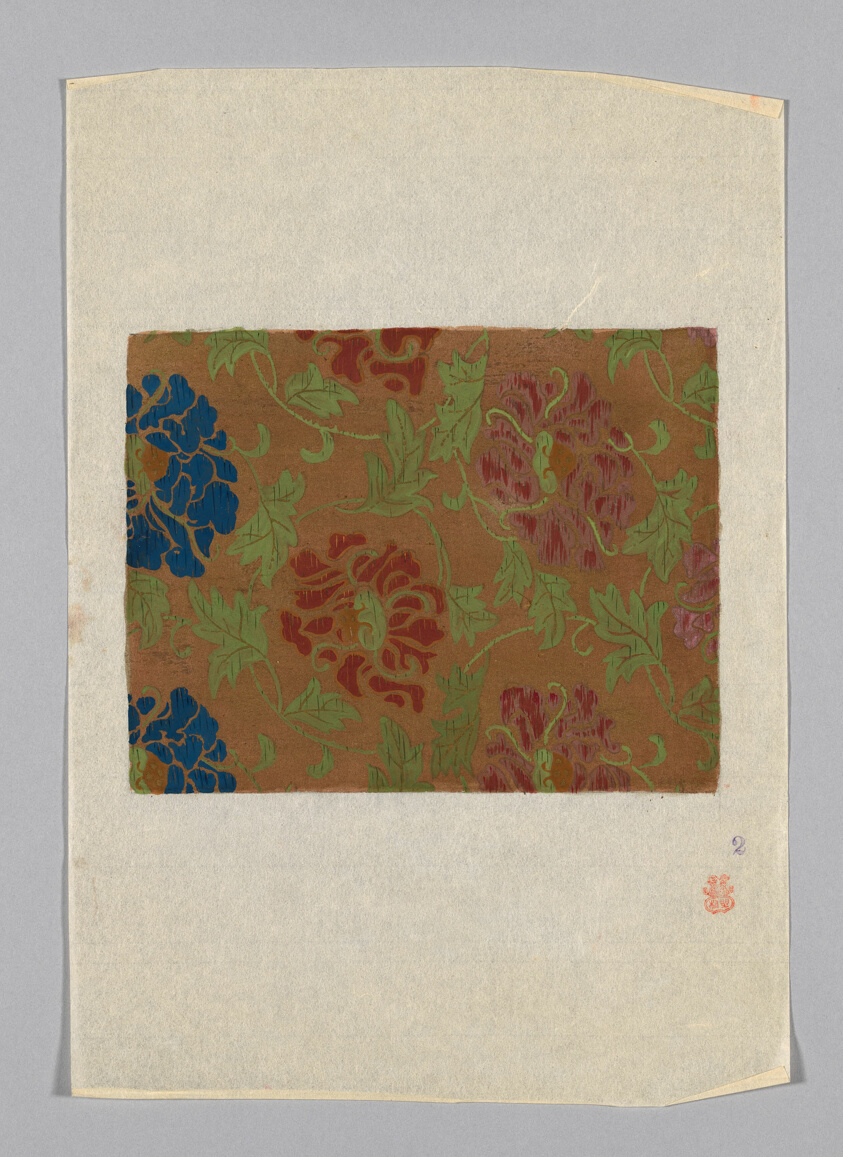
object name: Drawing and Watercolor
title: Design on Paper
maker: Japan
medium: Paper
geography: Japan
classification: textile; accessory - paper design; paper; watercolor